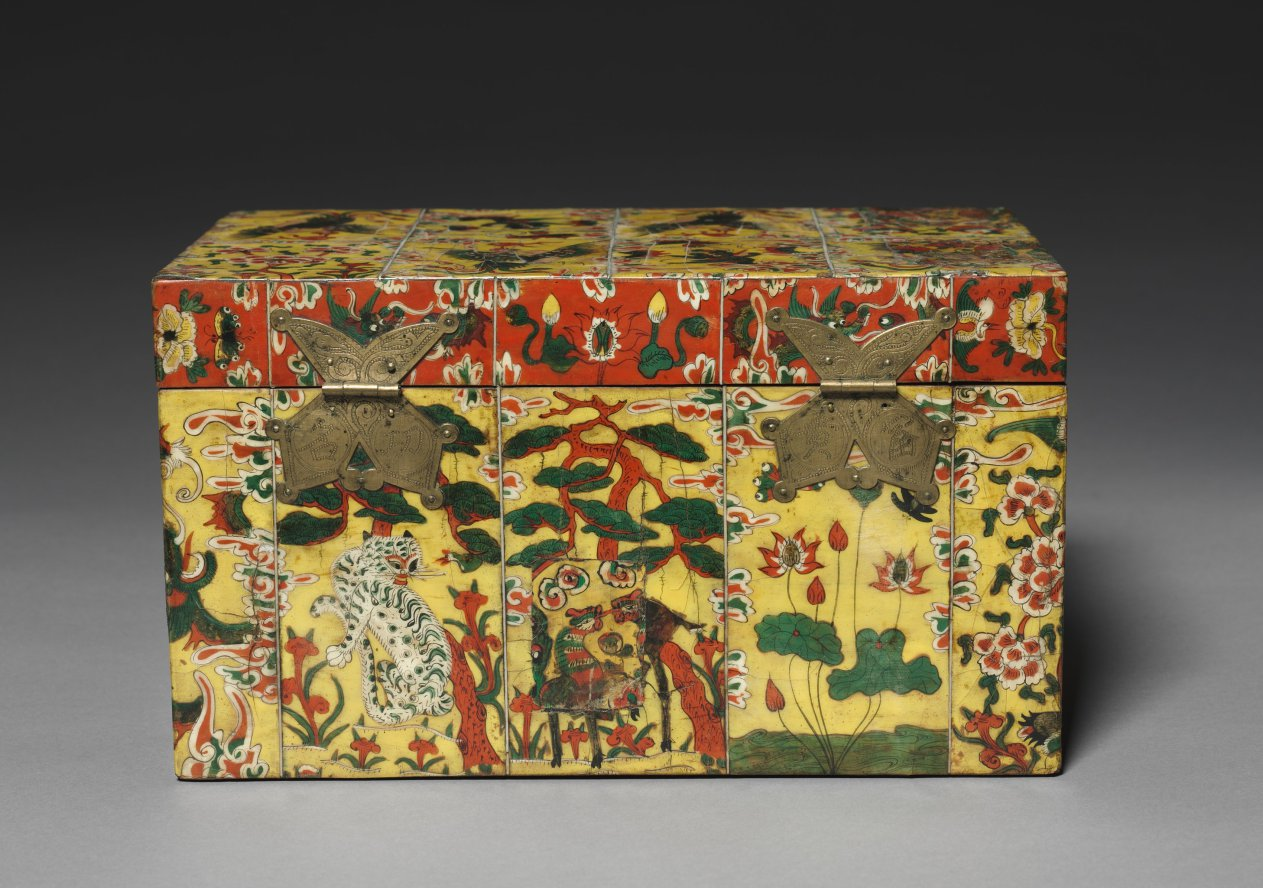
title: Box with Painted Oxhorn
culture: Korea, Joseon dynasty (1392–1910)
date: 1800s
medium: painted wood with flattened ox-horn inlay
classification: Miscellaneous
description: This box is colorfully decorated with the technique of oxhorn plating. The oxhorn was cut, soaked in water, boiled, and then pressed into thin translucent sheets. Since oxhorns are usually rather small, dozens of them were required to fully decorate even a small wooden object. This box is colorfully painted with the imagery of auspicious plants and animals such as dragons amid clouds, a white tiger under the pine tree, a grazing deer, and more. This kind of luxurious box was probably produced as a wedding gift.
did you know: This box is made of small flattened pieces of oxhorn. Since oxhorn is usually rather small, possibly dozens of them were used to fully decorate even a small wooden object like this box.